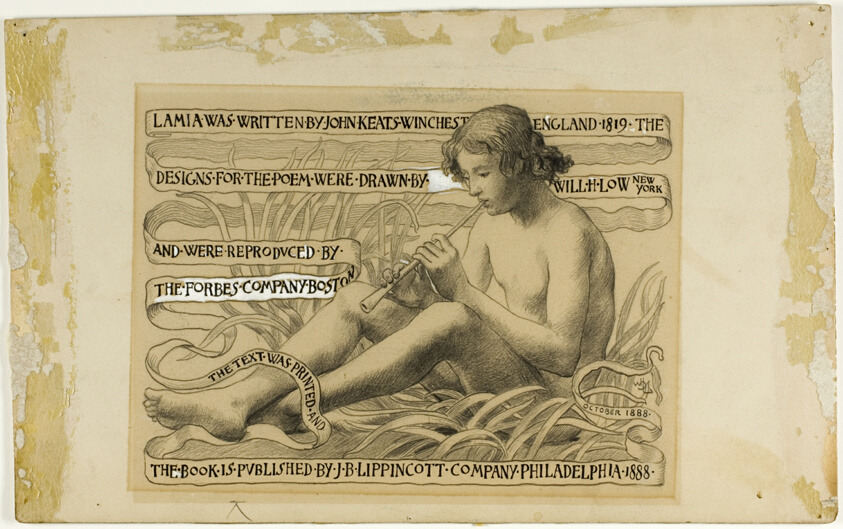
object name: Drawing and Watercolor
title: Tail-Peice - The History of the Book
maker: Will Hicock Low (American, 1853-1932)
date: c. 1888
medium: Charcoal, with black ink, heightened with touches of white gouache, on cream wood-pulp laminate board (discolored to tan)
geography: United States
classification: drawings (visual works); prints and drawing